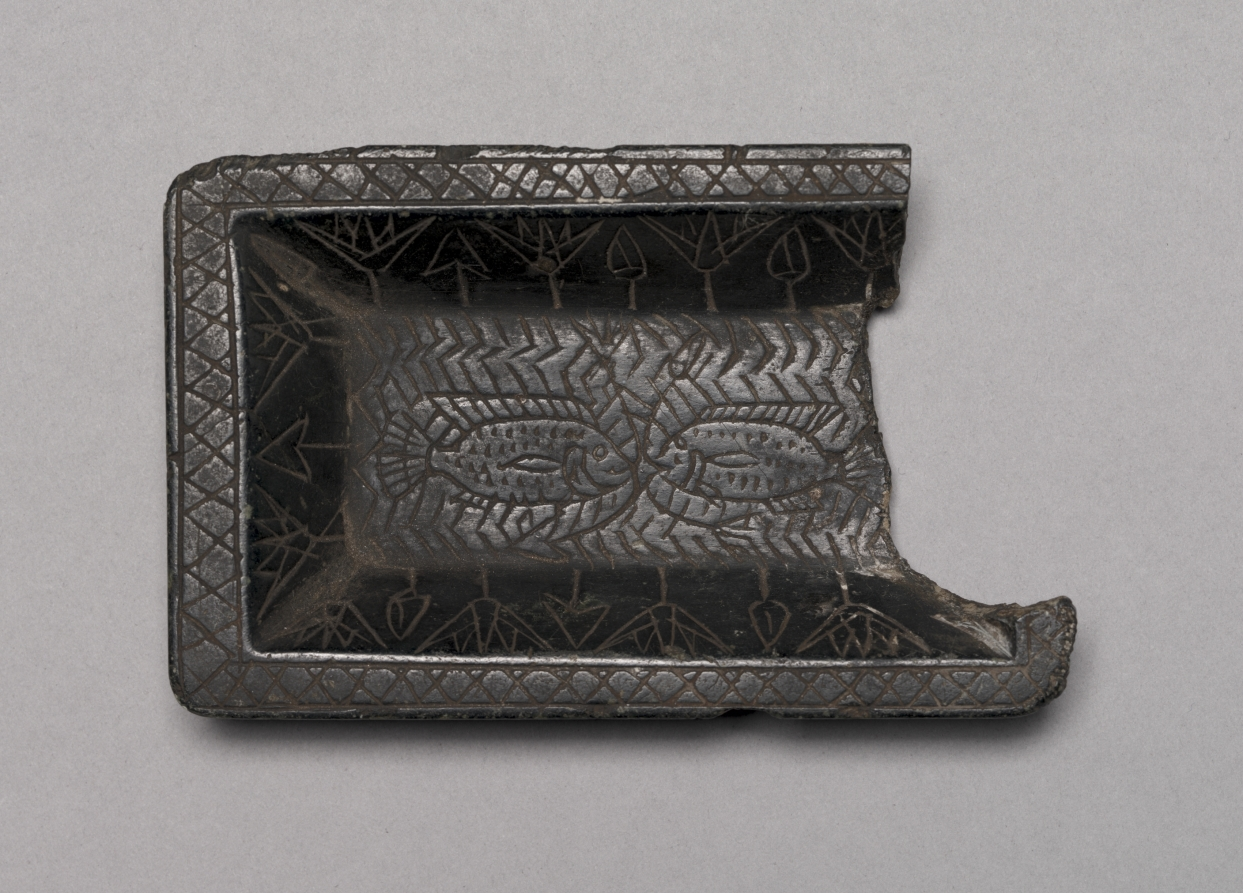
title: Tray with Pond Scene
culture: Egypt, New Kingdom (1540–1069 BCE), Dynasty 18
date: 1540–1296 BCE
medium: steatite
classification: Cosmetic Objects